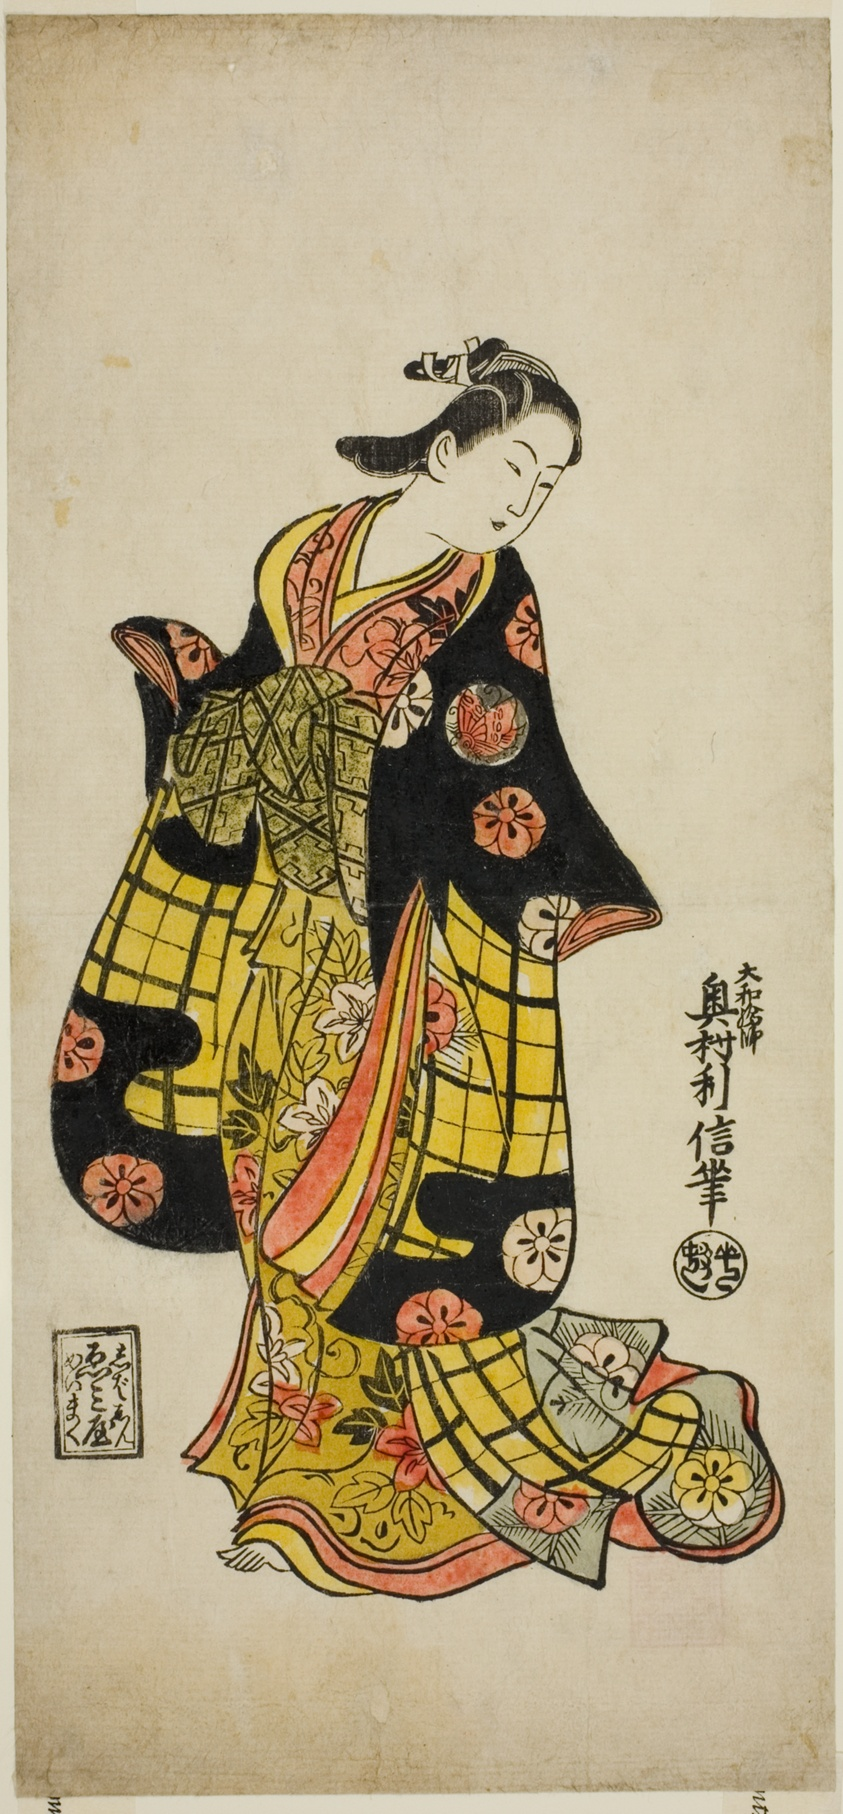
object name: Print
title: The Actor Sanjo Kantaro as a courtesan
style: Japanese (culture or style)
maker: Okumura Toshinobu (Japanese, active c. 1717-50)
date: c. 1723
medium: Hand-colored woodblock print; hosoban, urushi-e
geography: Japan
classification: woodblock print; print; asian art